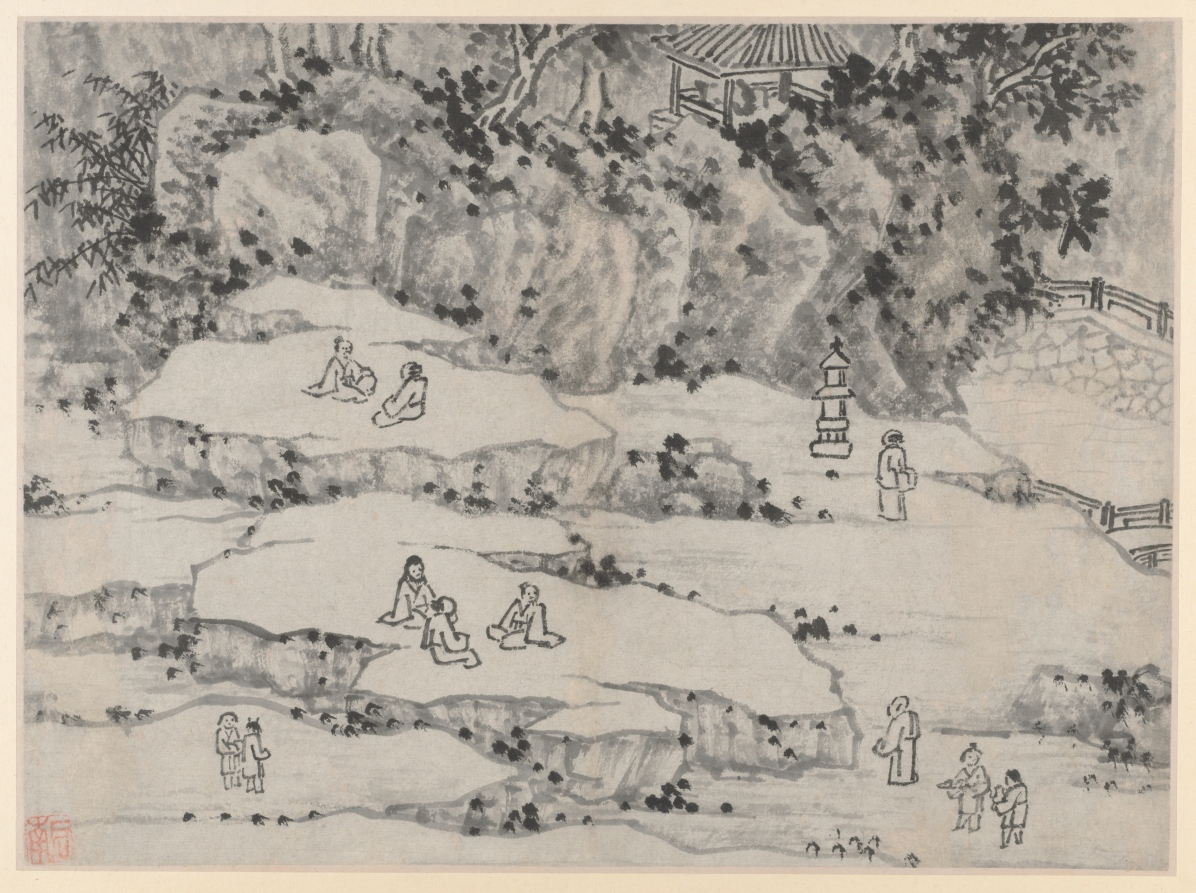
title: The Nodding Stone Terrace, Tiger Hill, and the Thousand-Man Seat, from Twelve Views of Tiger Hill, Suzhou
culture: China, Ming dynasty (1368–1644)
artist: Shen Zhou (Chinese, 1427–1509)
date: after 1490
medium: Album leaf; ink on paper or ink and slight color on paper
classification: Painting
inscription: [印] 启南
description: Views of Tiger Hill depicts a historic site a few miles northwest of Suzhou. The scenes simulate a visit from arriving by boat at the foot of the mountain to climbing to Cloudy Cliff Monastery. Representations of the artist’s mature style, Shen Zhou included views in subtle colors in the suite of monochrome scenes. A Suzhou native, Shen Zhou was supported by family wealth and rejected an official career in favor of life as a retired scholar. Turning to painting in midlife, he is regarded as the founder of the Wu School of painting, with its center in Suzhou.